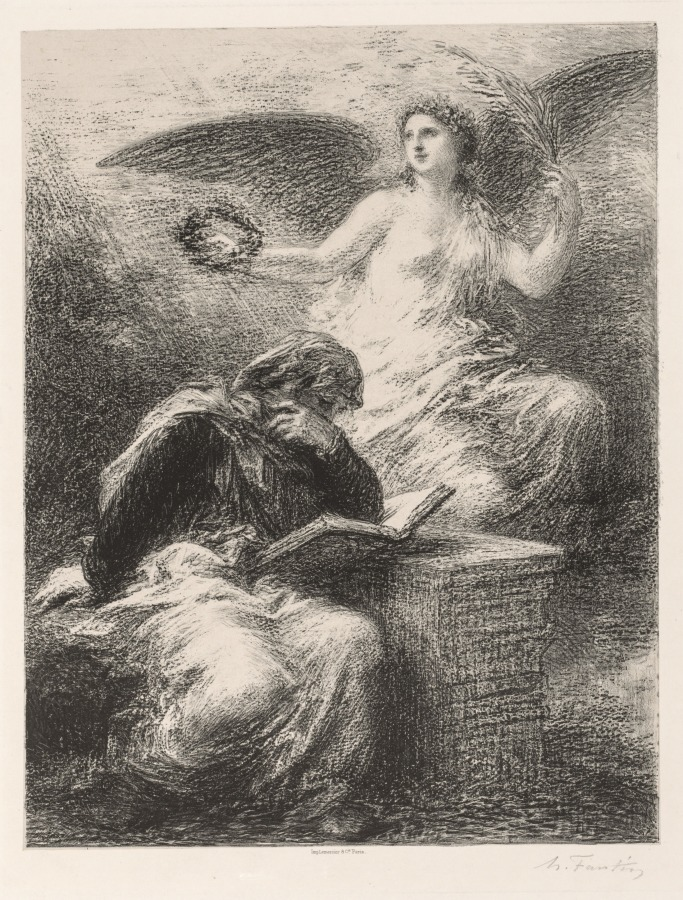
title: Glory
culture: France, 19th century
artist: Henri Fantin-Latour (French, 1836–1904)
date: 1890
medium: lithograph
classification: Print